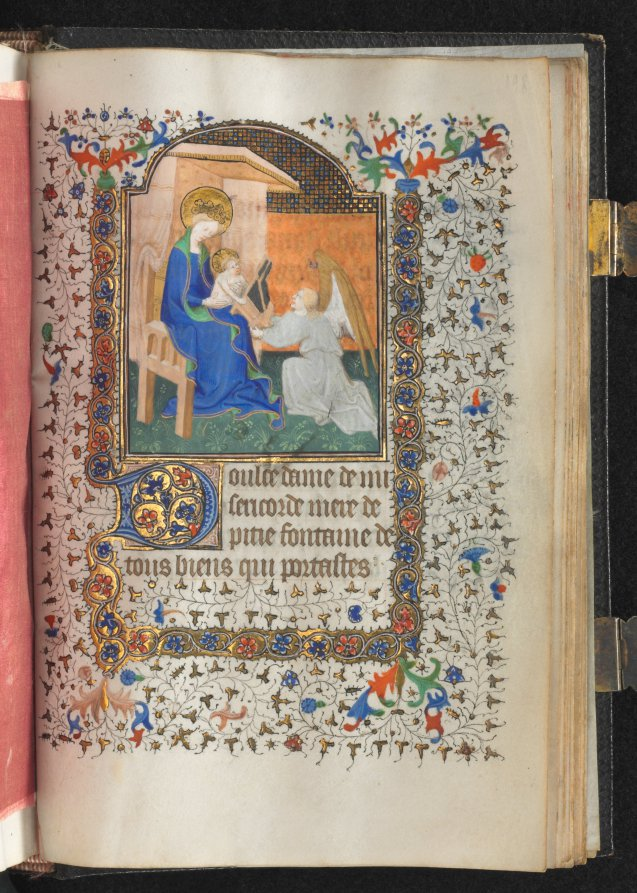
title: Book of Hours (Use of Paris): Fol. 198r, Madonna and Child with Angel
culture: France, Paris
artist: possibly studio or workshop of The Bedford Master (French, Paris, active c. 1405–30)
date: c. 1420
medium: ink, tempera, and gold on vellum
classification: Bound Volume